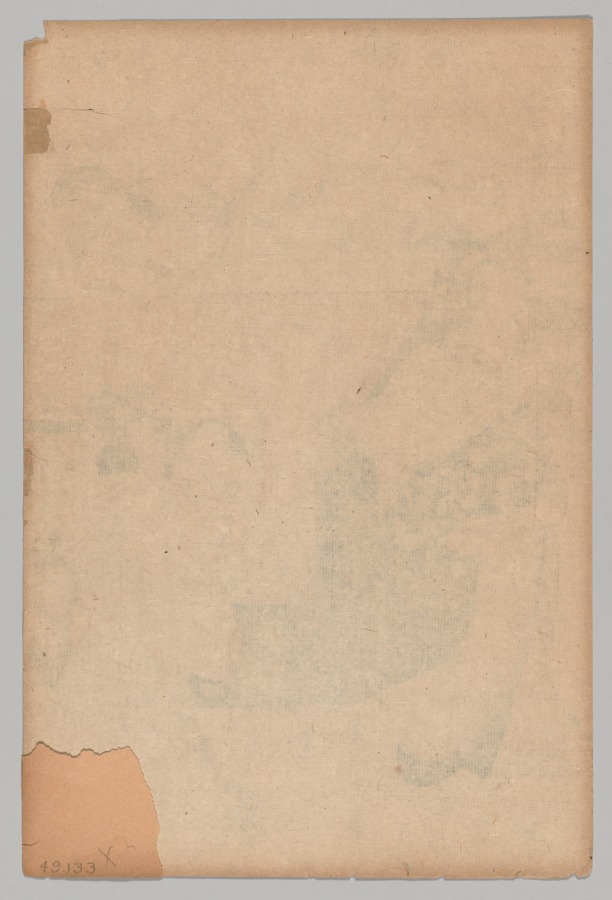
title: No Title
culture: Japan, Edo period (1615–1868)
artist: Kikukawa Eizan (Japanese, 1787–1867)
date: 1787–1869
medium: color woodblock print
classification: Print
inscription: Signature: Kikugawa Yeizan fude